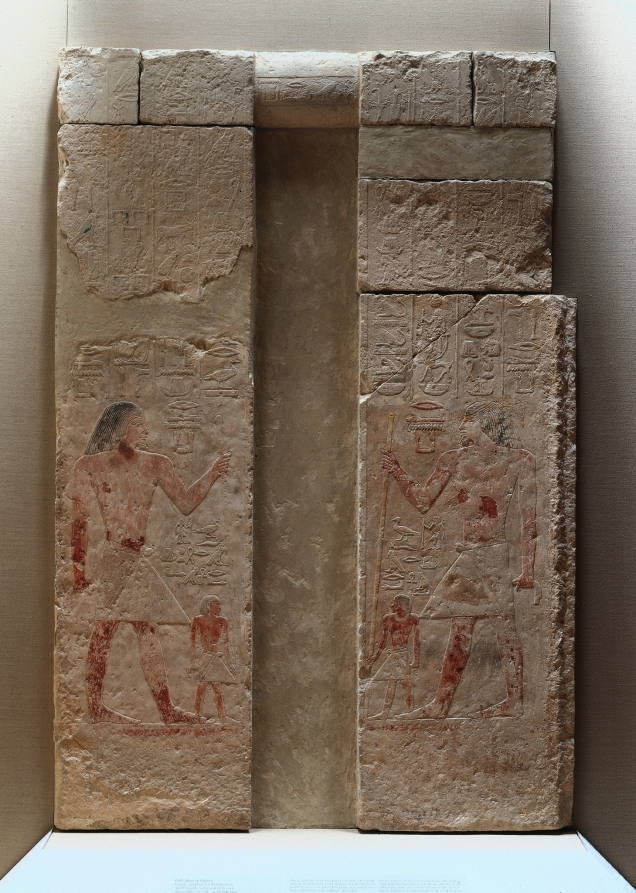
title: False Door of Nykara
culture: Egypt, Old Kingdom (2647–2124 BCE), Dynasty 5, reign of Nyuserre (2445–2422 BCE) or later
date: 2408–2341 BCE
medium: limestone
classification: Sculpture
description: The focal point of the tomb chapel was a false door built into its western wall. Food offerings for the deceased tomb owners were placed in front of it, and it was believed that the soul could pass through it. The inscriptions list Nykara's numerous titles both at court and in the state bureaucracy. His eldest son, Ankhmara, who succeeded Nykara in the granary administration, is shown in much smaller scale in front of him.